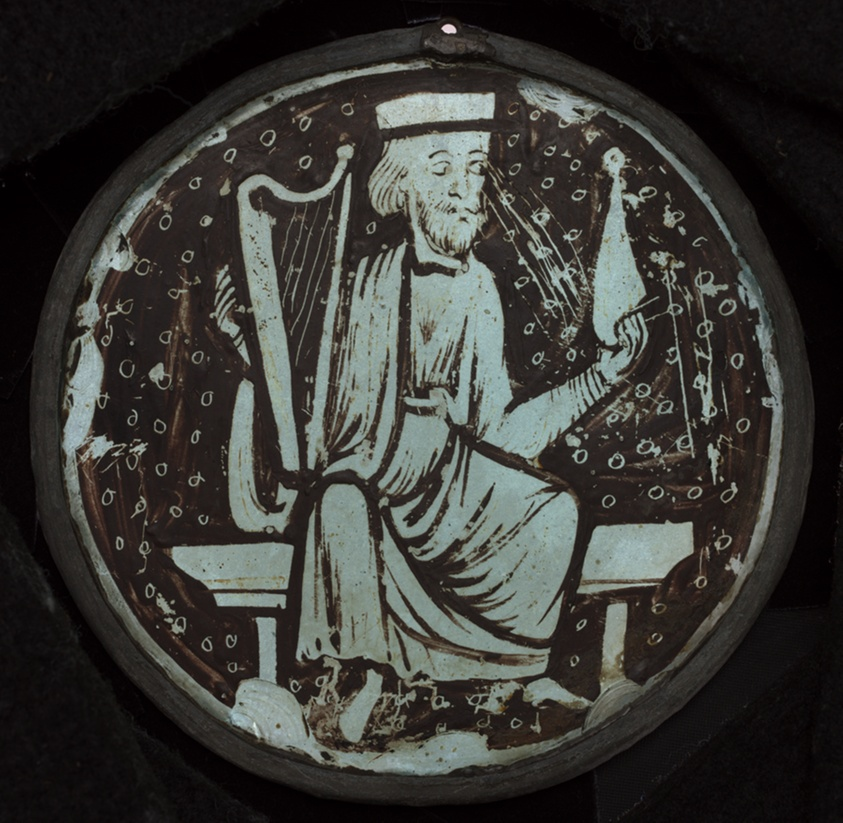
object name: Glass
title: Roundel with Elder of the Apocalypse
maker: French or English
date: 1250-75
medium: Glass, paint, silver stain, lead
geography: France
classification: stained glass/leaded glass; glass; european decorative arts; decorative arts